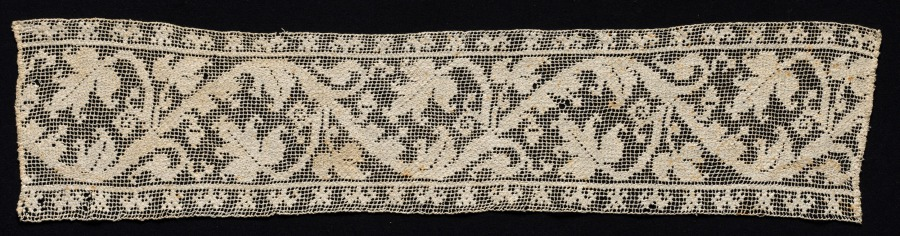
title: Fragment of a Band with Vine Scroll and Leaves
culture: Italy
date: 1500s–1600s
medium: Bleached linen (est.): needle lace, filet/lacis (knotted ground and darned in two directions)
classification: Lace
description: A scrolling vine with budding vegetation or a tendril motif is a recurring pattern in needle lace. The frequent use of the motif, adapted in lace from different centuries and regions, suggests that it was found in a pattern book.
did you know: Books of patterns for lace-making and other needlework were aimed at well-to-do women and girls as a way of encouraging domestic virtue.